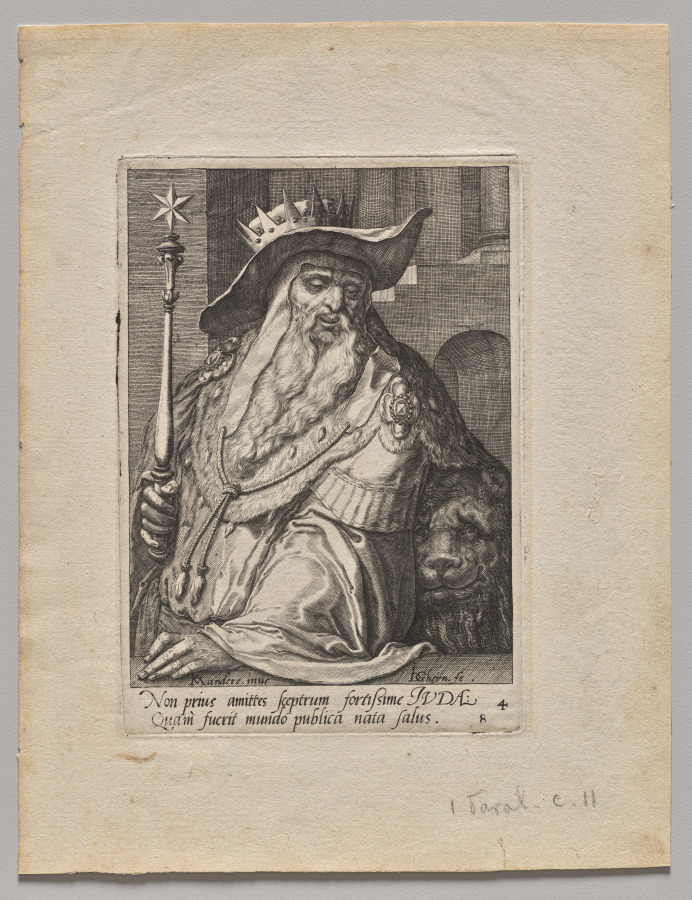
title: Plate 4: Judah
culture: Netherlands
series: The Twelve Sons of Jacob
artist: Jacob de Gheyn II (Netherlandish, 1565–1629)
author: after Karel I van Mander (Netherlandish, 1548–1606)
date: c. 1589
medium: engraving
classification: Print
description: In this print, the biblical figure Judah is posed in a ceremonial robe with a lion and holding a scepter, symbolizing his power, bravery, success in battle, and leadership. This is one of a series of prints depicting the twelve sons of Jacob, each with an attribute and costume that denotes his character. According to the Old Testament, Jacob blessed each of his twelve sons, prophesizing the destiny of their tribe, and assigning them a parcel of land in Canaan. The print series was made in the Netherlands in the late 16th century, a time of political struggle when Old Testament heroes were popular exemplars of fortitude and patience.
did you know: The crown atop the hat of this Old Testament figure symbolizes his status as an ancestor of Kings David and Solomon.